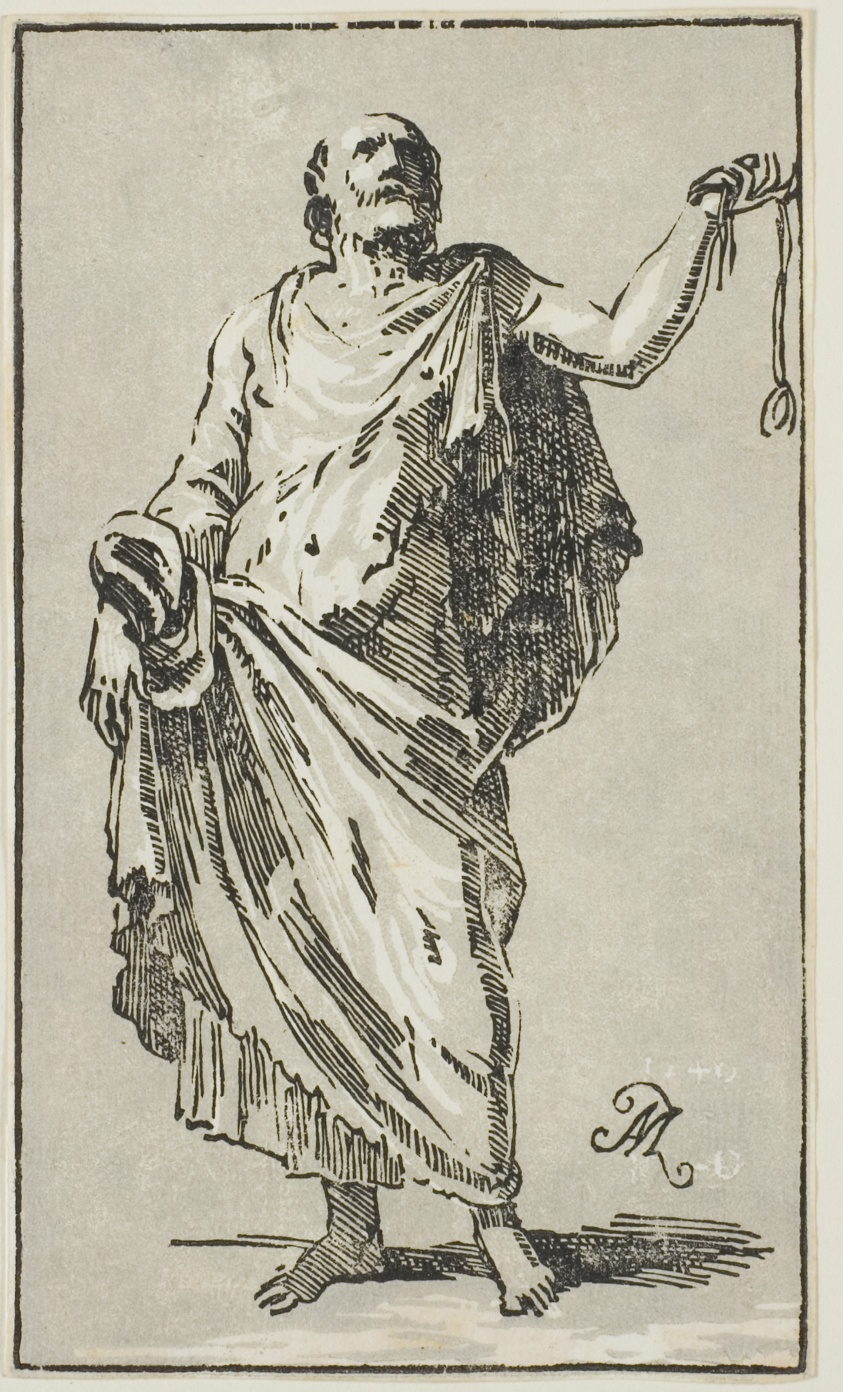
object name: Print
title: An Apostle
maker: Conte Anton Maria Zanetti; Italian, 1680–1767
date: 1740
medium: Chiaroscuro woodcut in gray and black on ivory laid paper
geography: Italy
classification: woodcut; print; prints and drawing